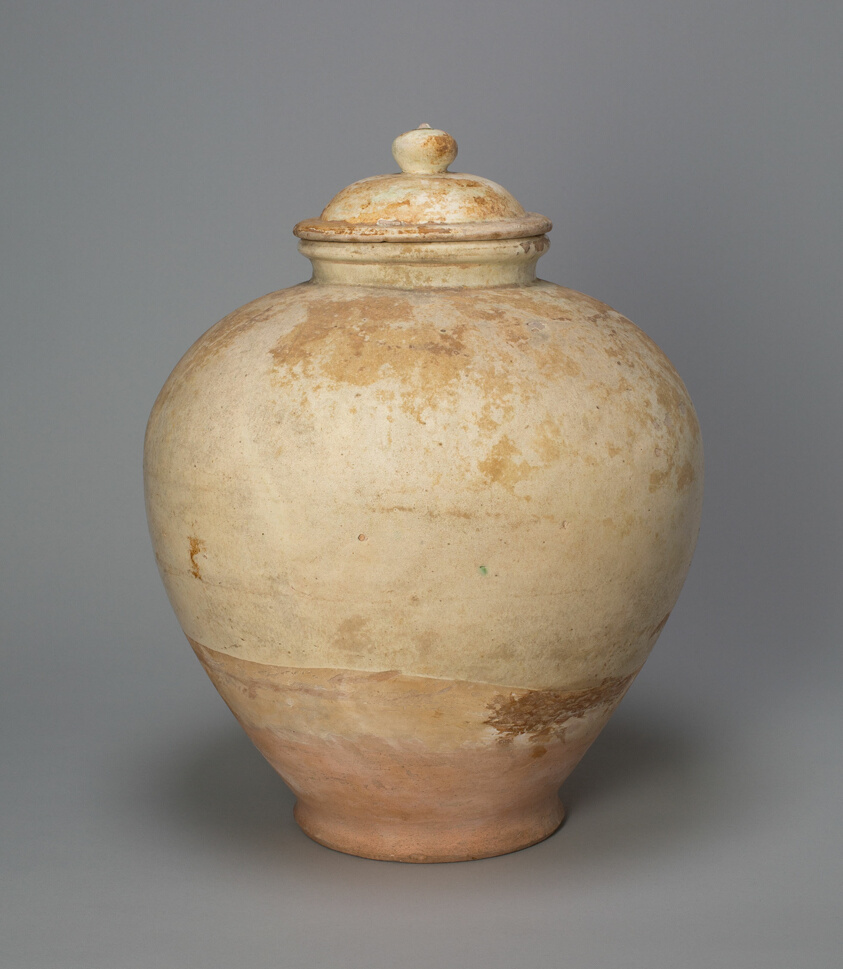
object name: Vessel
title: Covered Jar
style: Chinese (culture or style)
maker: China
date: Tang dynasty (618–906), early 8th century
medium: Slip-coated earthenware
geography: China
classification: earthenware; ceramics; sculpture; asian art; vessel